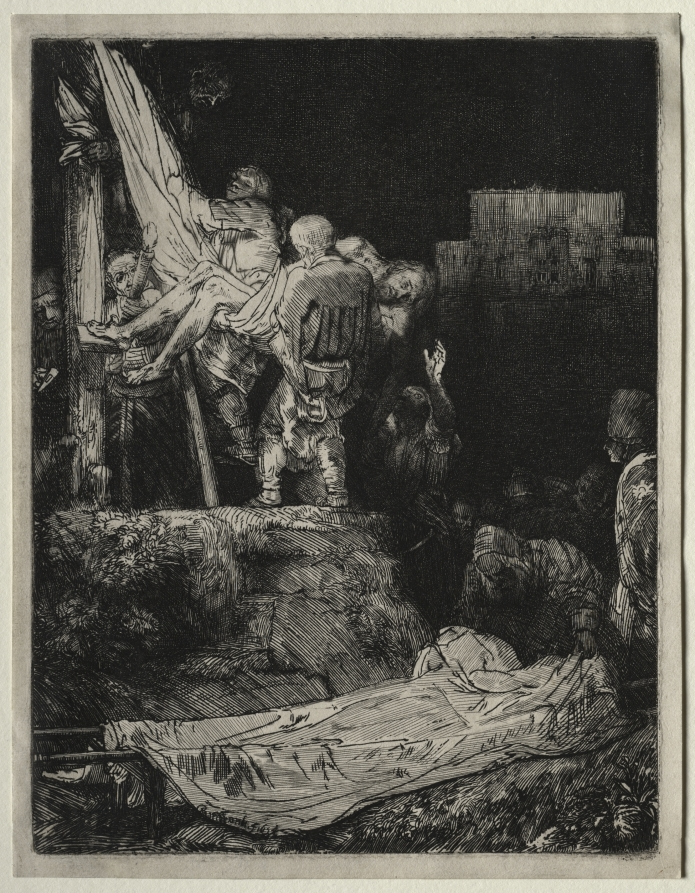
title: The Descent from the Cross by Torchlight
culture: Netherlands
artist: Rembrandt van Rijn (Dutch, 1606–1669)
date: 1654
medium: etching and drypoint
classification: Print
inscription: lower left, in plate: Rembrandt f. 1654['a' reversed] ; VERSO, lower left, in graphite: Casimir Perier sale 11-98 ; lower left, in graphite: [\+ ; lower center, in pen and brown ink: 2[illegible character] ; lower center, in graphite: n° 83[s?]. ; lower center, in graphite: Vle F[m?] Didot. ; lower right, in graphite: B. 88. Cl. 87. ; lower right, in graphite: 36241